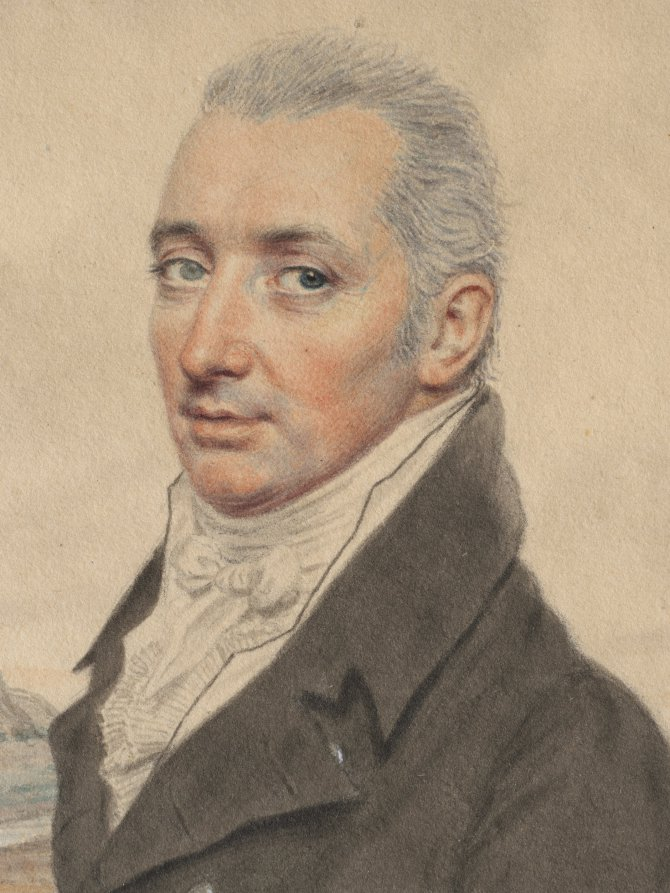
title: Portrait of General Keith MacAlister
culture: England, 18th century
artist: John I Smart (British, 1741–1811)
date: c. 1800–1810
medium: watercolor and graphite, heightened with traces of white gouache, on paper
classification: Portrait Miniature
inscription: across bottom, in graphite: Genl Macalester ; VERSO, center, in graphite: 169; lower left, in graphite: l. 159. [circled]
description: Although it is impossible to say if it was always part of the artist’s process to execute a preparatory sketch prior to painting each miniature, we do know that John Smart retained many hundreds of these sketches. A great number were inherited by his son John James Smart, who in turn left them to his daughter Mary Ann Bose. Upon her death in 1934, they were divided between three of her children: William Henry Bose, Lilian Dyer, and Mabel Annie Busteed. General MacAlister is represented in three-quarter view, bust length, and facing the right. His eyes are blue, but the right eye is clouded and lighter in color than the left. There is no sign of isolated damage or fading, confirming that this color difference was among MacAlister’s physical attributes. He wears a brown coat; white, frilled vest edged in black; tall collar; and a white cravat tied in a bow. His closely cropped hair is powdered, and an unidentified rocky landscape through which a small river runs is painted in the background; it probably represents a place of personal significance in Scotland or India, possibly even Seringapatam and the Cauvery River. Smart depicted MacAlister inside of a penciled oval tromp l’oeil frame. The drawing is replete with physically informative details and is larger and more finished than drawings intended to function exclusively as preparatory sketches, though it may also have served this purpose. Beneath the elaborate penciled border is written in large graphite script “Genl Macalester.” This inscription is not in the artist’s hand and almost certainly a later addition. A Colnaghi label was removed from the verso after the work entered the museum’s collection. The sitter is likely Major-General Keith MacAlister (1746–1820) of the Madras Cavalry. He was the eldest of three soldier brothers who served with distinction in India. MacAlister was born at Skerrinish in the Isle of Skye and ascended through the ranks rapidly following his appointment as cadet in 1777. He became captain in 1796; lieutenant-colonel in 1799; colonel in 1809; and major-general in 1812. He is celebrated particularly for his role in the 1799 storming and capture of Seringapatam, a decisive battleground in the Fourth Anglo-Mysore War, and for rescuing his brother Matthew from a long imprisonment in the same city. MacAlister was also instrumental in organizing the Madras Light Cavalry.5 Smart’s portrait of MacAlister would have been painted between 1800 and 1810, when the sitter was an older man and had returned to England before settling in Scotland. The Nelson-Atkins Museum of Art owns a Smart portrait on ivory called Keith Michael Alexander, dated 1810. Although he wears a military uniform rather than civilian clothes, the sitter is identical to the one in the Cleveland drawing—note in particular the differently colored eyes and the blue veins at the left temple. Although it was painted in 1810, possibly some years after the Cleveland sketch, the sitter’s hair loss is more pronounced in the earlier drawing. This inconsistency can be explained by the fact that Regency fashion called for men to comb their hair forward, thereby obscuring baldness, as seen here. Otherwise, the portraits are so similar that it is likely that Smart was consulting the earlier finished drawing when executing the 1810 miniature in ivory. Both “General Macalister” and “Colonel Keith Michael Alexander” are listed by Daphne Foskett among Smart’s sitters, but she reproduces images only of the latter Nelson-Atkins miniature. No additional portraits of the period depicting gentlemen of either name have been discovered at this time. The Nelson-Atkins ivory has been called Keith Michael Alexander by tradition at least since it was in the Mr. and Mrs. John W. Starr collection before entering the museum in 1958. However, the miniature has not been removed from the frame since its acquisition, and there is no evidence of an inscription. It is likely that Keith Michael Alexander is a mistaken interpretation of the name Keith MacAlister, particularly because no record of a soldier by the name of Keith Michael Alexander has been discovered.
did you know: Sketches helped John Smart work out the particulars of a portrait before commencing the miniature on ivory; they were useful in the event that a duplicate might later be required.